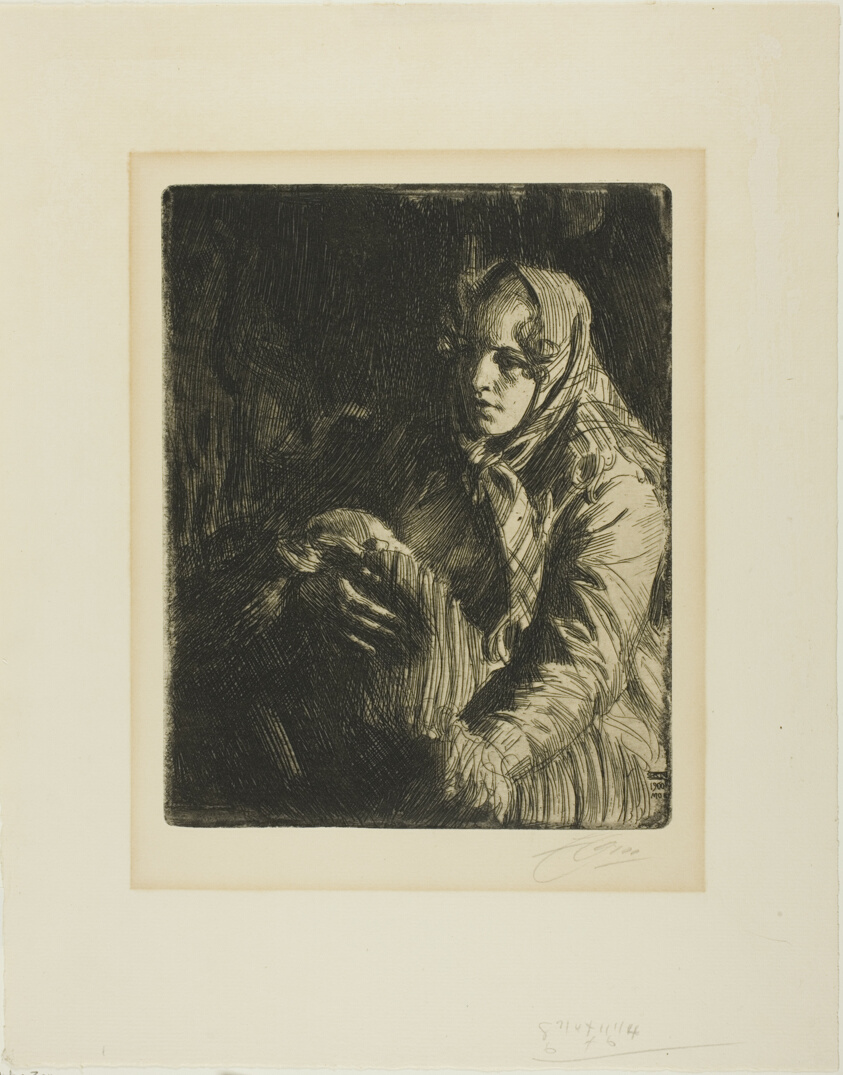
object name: Print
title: Madonna (A Mother)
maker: Anders Zorn (Swedish, 1860-1920)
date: 1900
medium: Etching on ivory laid paper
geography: Sweden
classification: etching; print; prints and drawing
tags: mothers, children